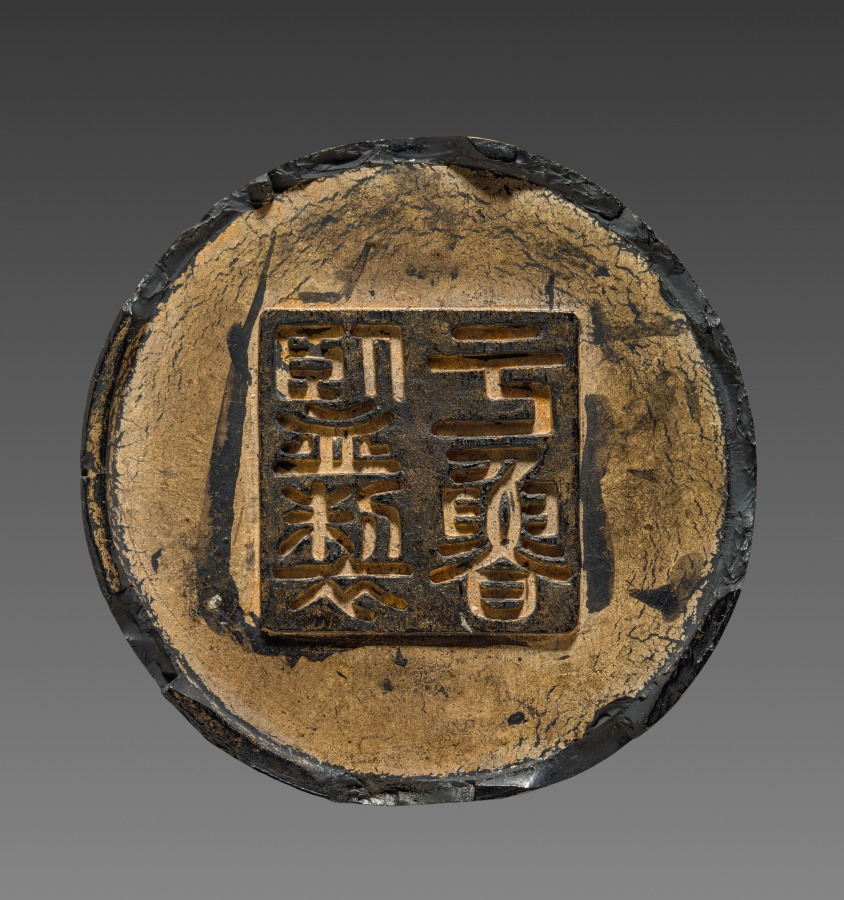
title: Ink Cake with Wang Ziqiao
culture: China, Ming dynasty (1368-1644) - Qing dynasty (1644-1911)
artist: attributed to Fang Yulu (Chinese, active c. 1570–1619)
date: c. 1600s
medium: Molded ink and gold pigment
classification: Miscellaneous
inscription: Mark on base: 于魯監製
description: Ink cakes were dissolved with water to be used for writing and painting. This ink cake depicts the immortal Wang Ziqiao riding a crane and playing a sheng (wind instrument with reeds). Legend says that he was a prince who became a Daoist immortal. The design was likely borrowed from an illustrated Ming dynasty book on Daoist immortals printed in Anhui, the Liexian Quanzhuan. Ink cakes using Fang Yulu’s name, a famous ink maker in Huizhou, Anhui province, may just as well be products of followers who aspired to profit from his fame. His greatest local rival was his former mentor Cheng Dayue (1541–after 1610).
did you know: The front, back, and sides of this ink cake are partially gilded.